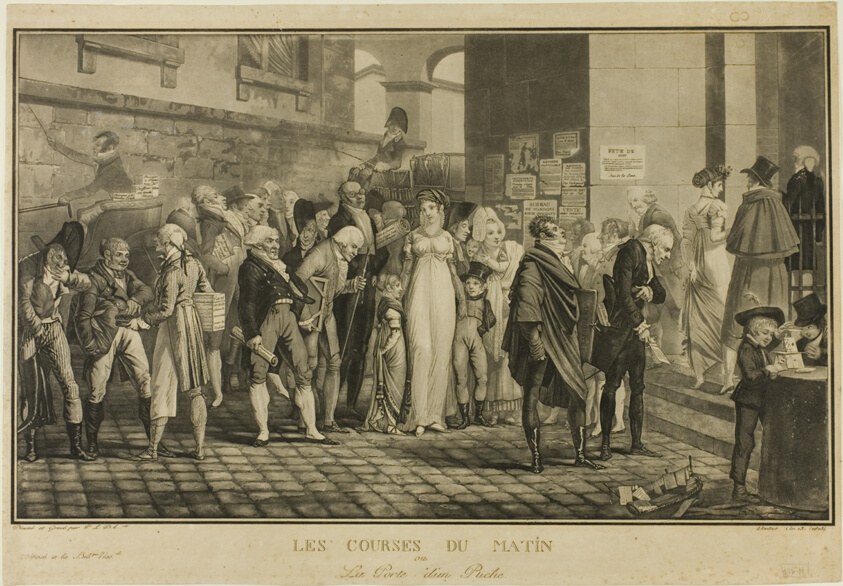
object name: Print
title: At the Door of a Wealthy Home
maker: Philibert Louis Debucourt (French, 1755-1832)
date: 1805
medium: Etching and aquatint on paper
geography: France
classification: aquatint; print; prints and drawing